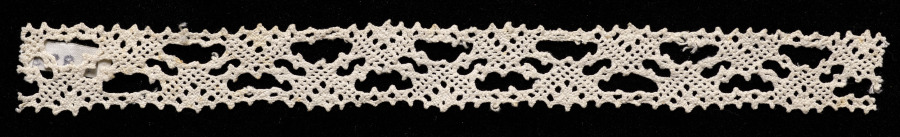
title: Lace Insertion (no selvage)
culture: Italy, Venice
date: 1540–60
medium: Bobbin lace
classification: Lace